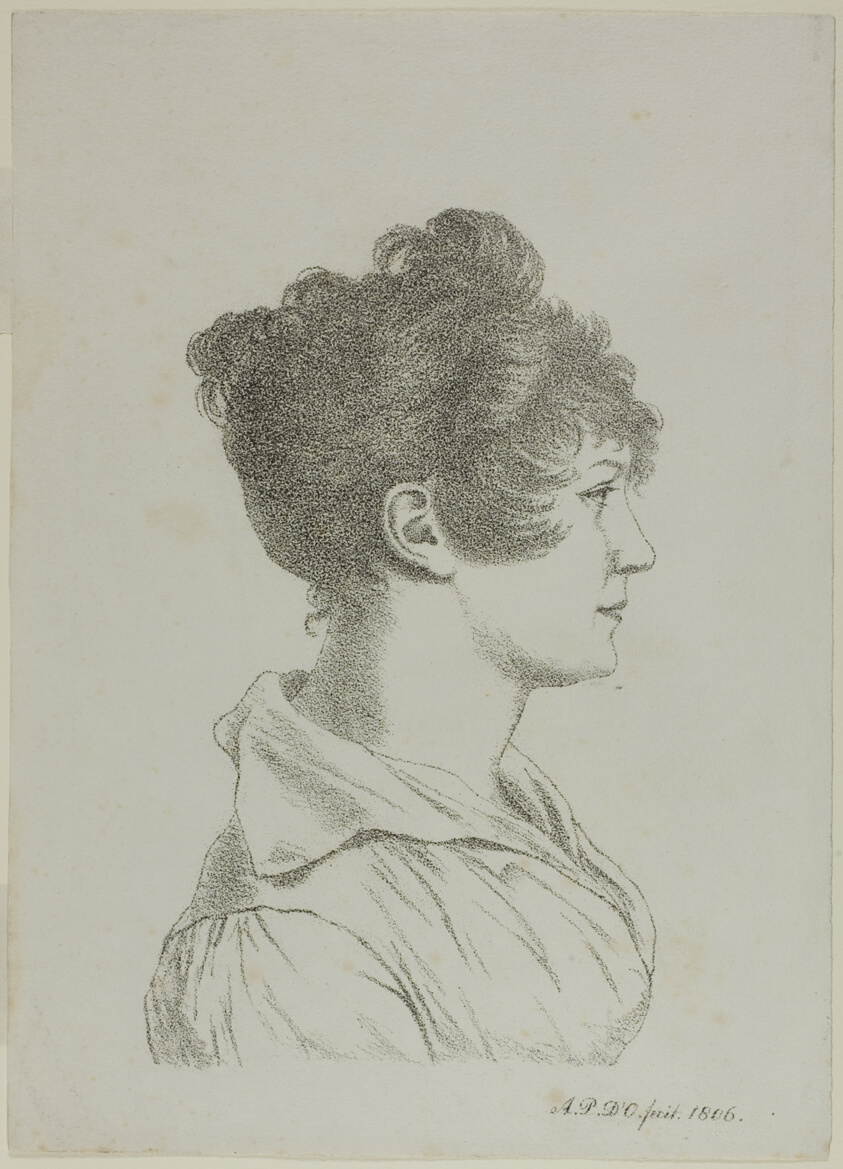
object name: Print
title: Portrait of Madame Adelaide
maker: Antoine Philippe d'Orléans (French, 1775-1807)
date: 1806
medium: Lithograph in black on ivory wove paper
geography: France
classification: lithograph; print; prints and drawing